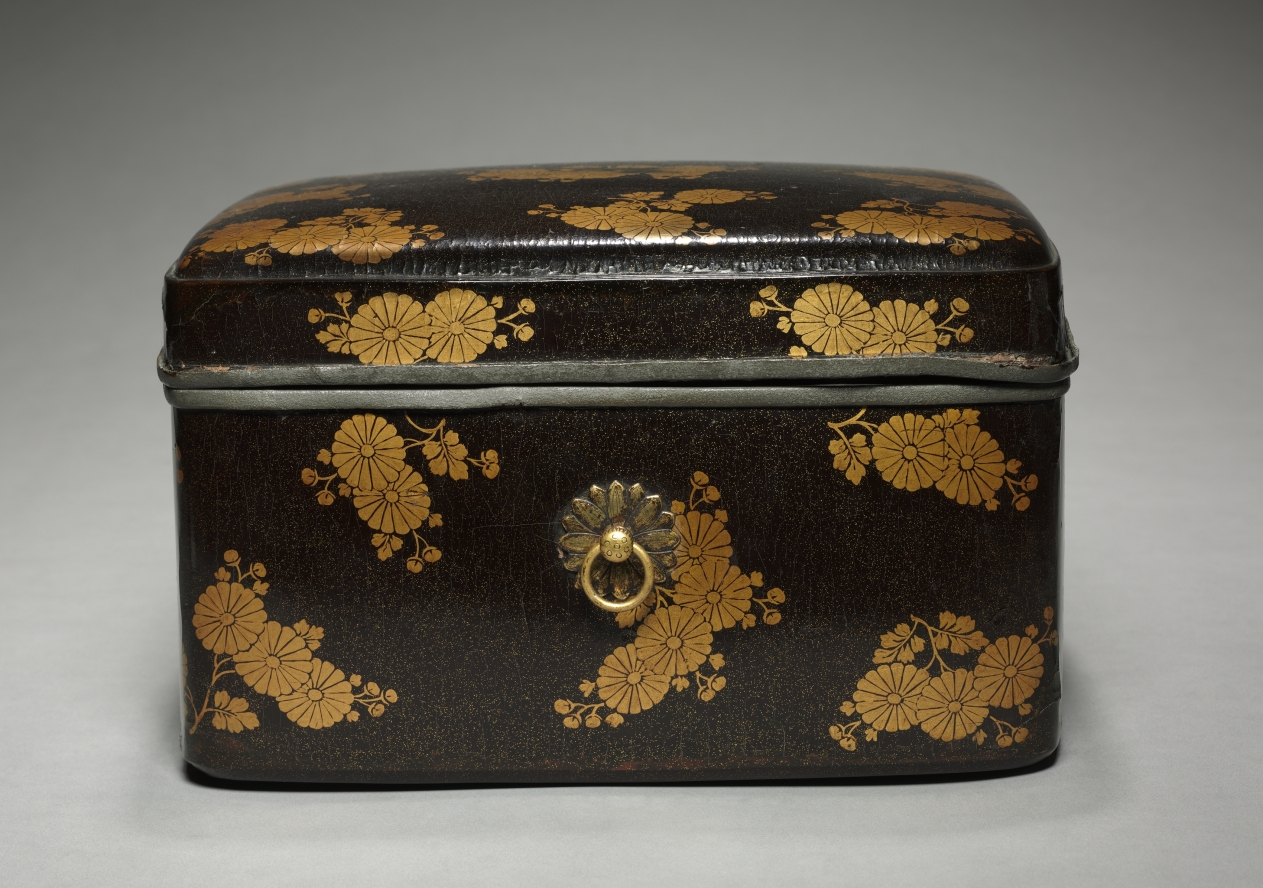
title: Cosmetics Box with Chrysanthemums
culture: Japan, Kamakura period (1185–1333)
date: early 1300s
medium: lacquer on wood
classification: Lacquer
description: In China, the chrysanthemum was historically appreciated for its association with the Double Nine Festival and the reclusive life of the poet Tao Yuanming (AD 365-427). In Japan, the 16-petaled chrysanthemum came to symbolize the Japanese imperial family after Emperor Gotoba (1180-1239) chose the motif as his personal emblem, having it applied to his sword and everyday utensils. This box proves that the flower also appeared on lacquer wares as early as the Kamakura period.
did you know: In Japanese, this type of small box is called a tebako, literally a hand box, and was typically part of a cosmetics set.